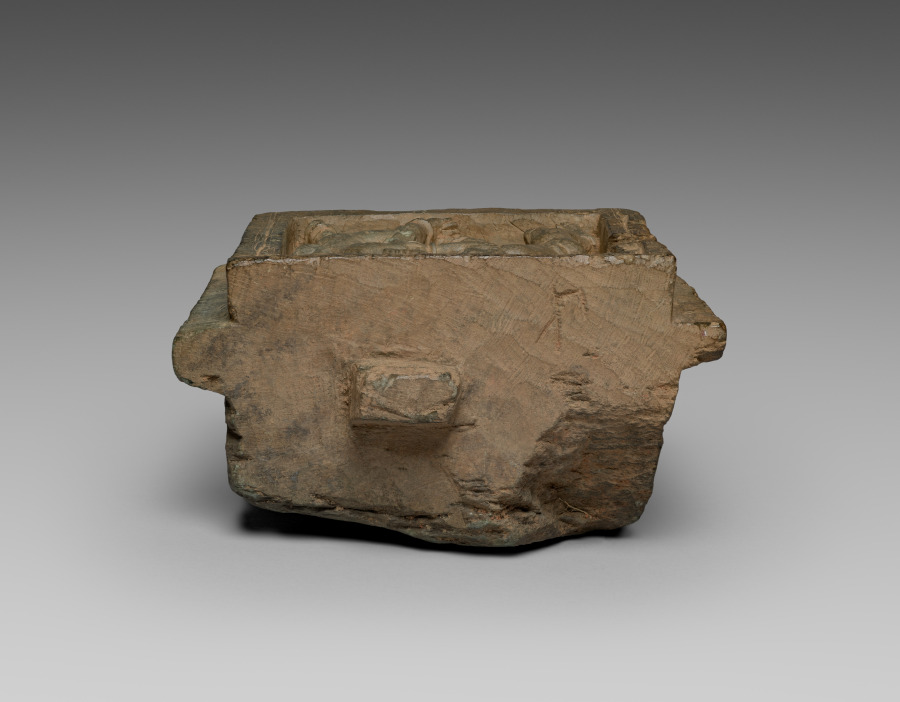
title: Architectural Bracket with Wrestlers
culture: Pakistan, Gandhara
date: 100s–200s CE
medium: schist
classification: Sculpture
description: This sculpture probably derived from Greco-Roman prototypes of nude athletes, but here it has probably been transposed into a scene from the boyhood of the Buddha, when it is said that he excelled in all forms of athletics.